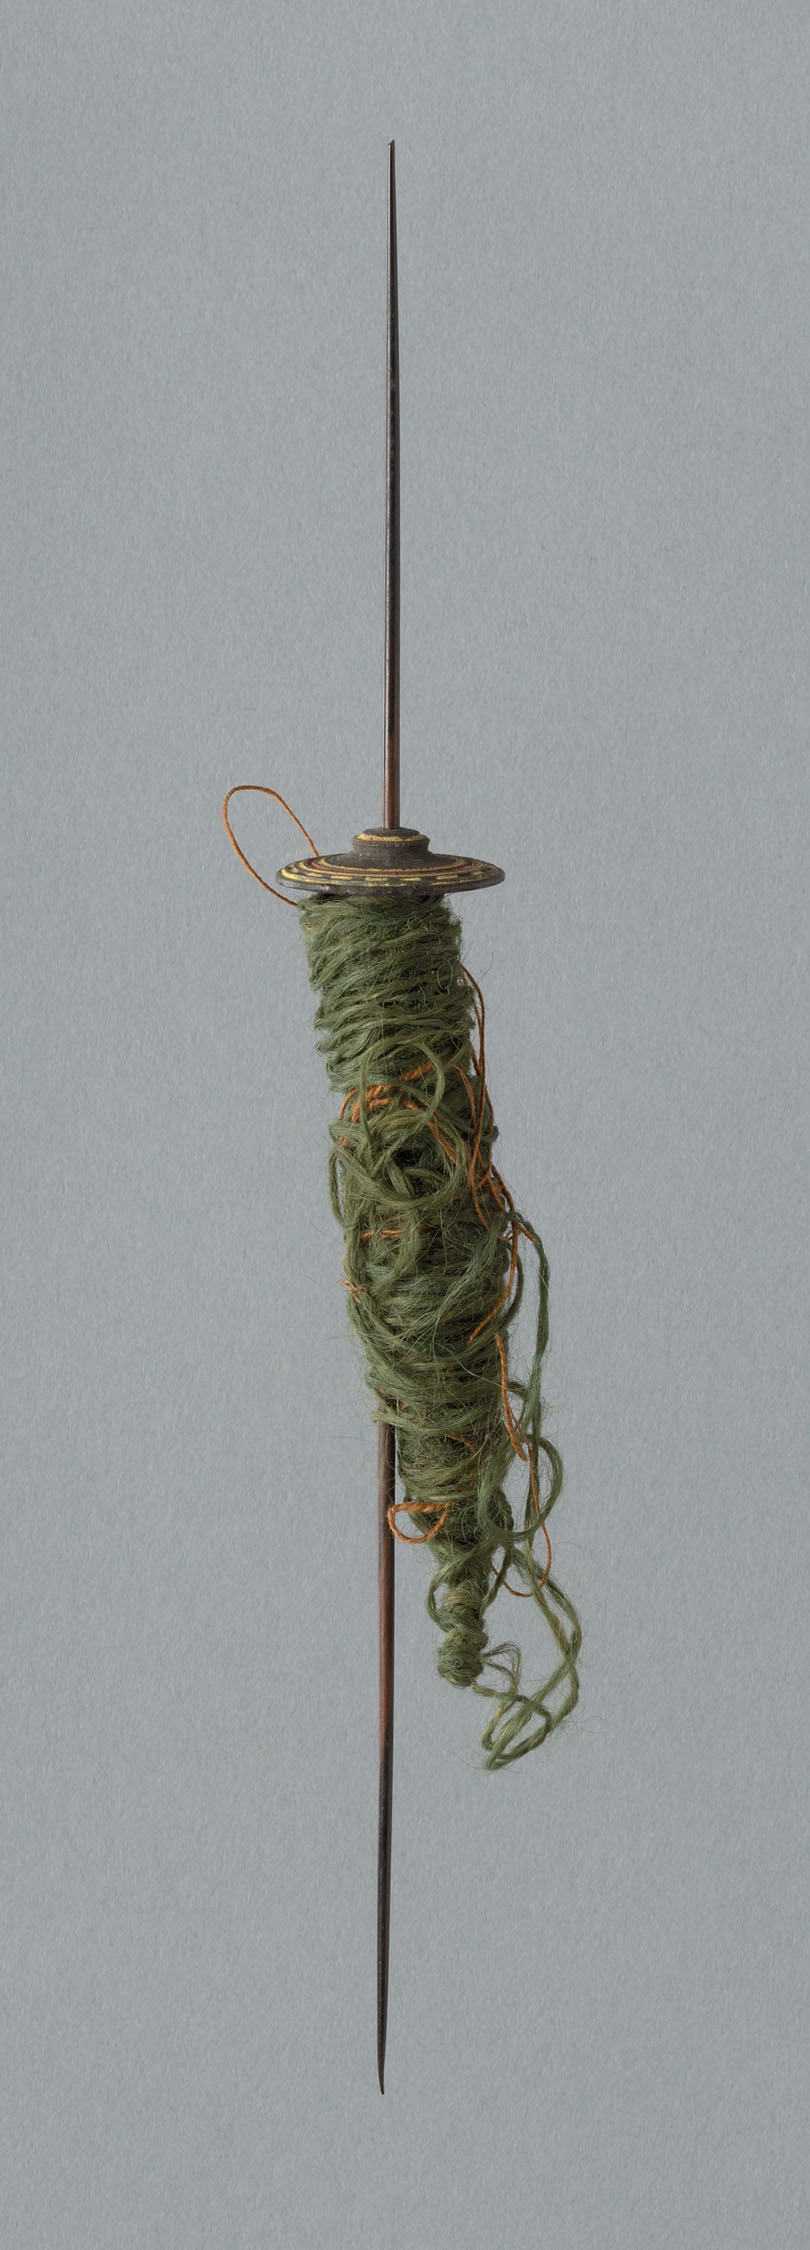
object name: non-art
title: Wooden Spindle with Ceramic Whorls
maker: Possibly central coast, Peru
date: 1000/1476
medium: Wood, polychrome ceramic, and wool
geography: Peru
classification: textile working equipment; whorls (spindle flywheels); spindles (textile working equipment); textile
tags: super/natural